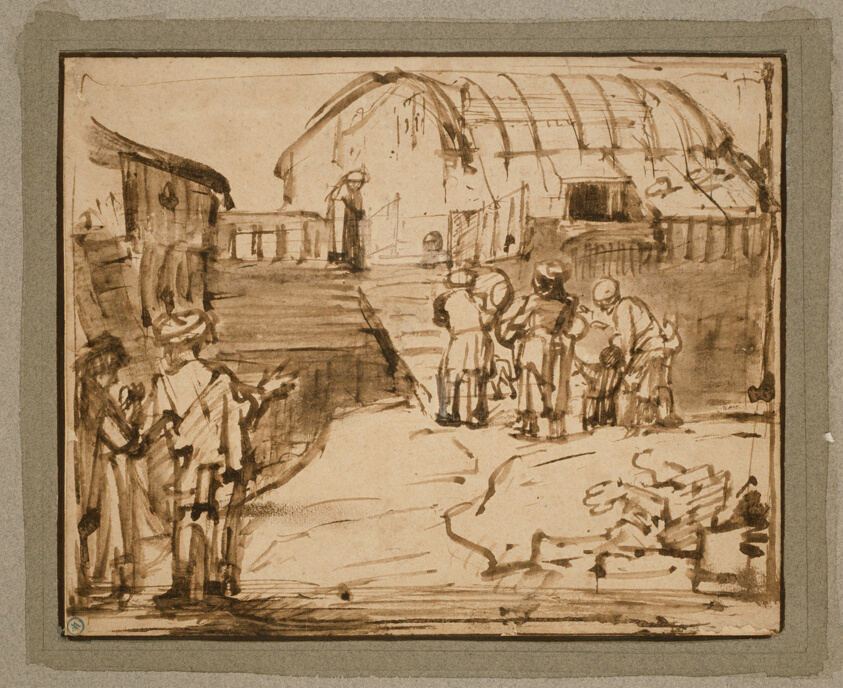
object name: Drawing and Watercolor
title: Noah's Ark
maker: Rembrandt van Rijn (Dutch, 1606-1669)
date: c. 1660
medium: Pen and brown ink and brush and brown ink wash on cream laid paper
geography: Holland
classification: pen and ink drawings; drawings (visual works); prints and drawing